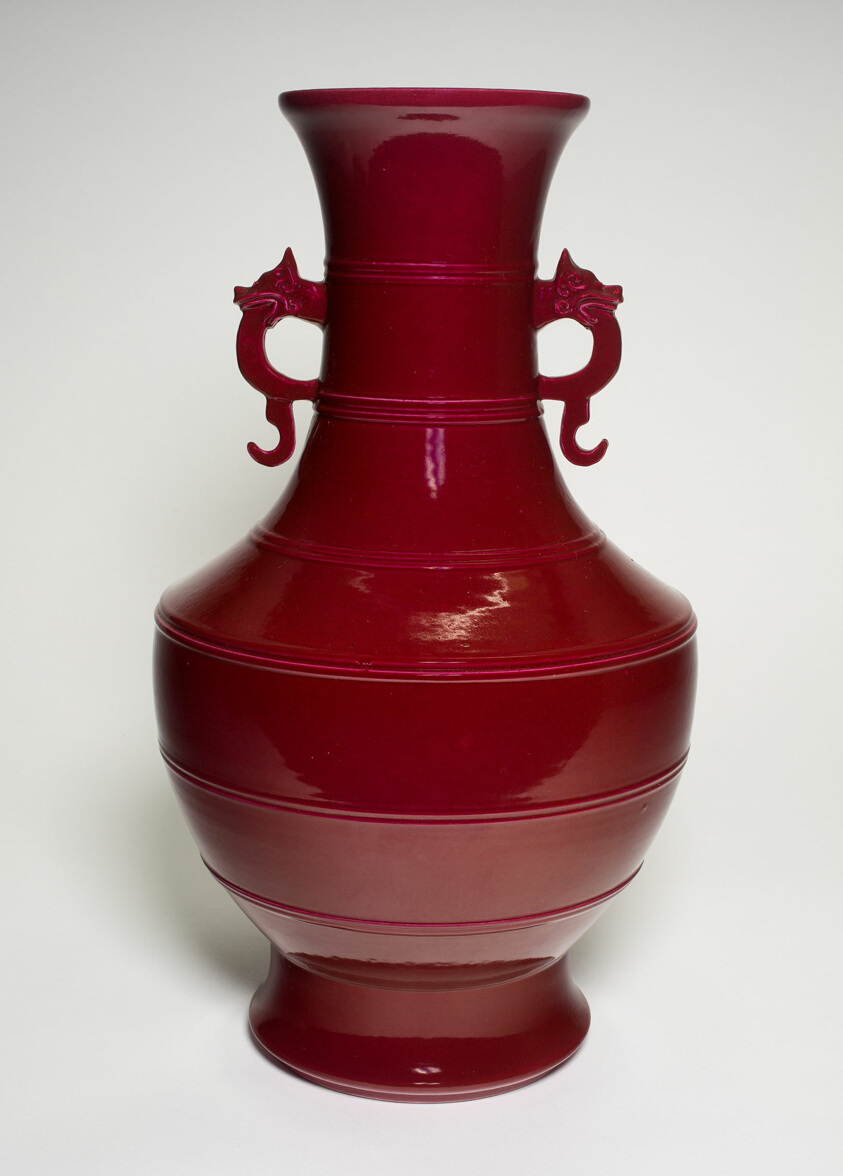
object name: Vessel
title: Vase in the Shape of an Ancient Ritual Bronze Hu Vessel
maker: China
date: Qing dynasty (1644–1911), Qianlong reign mark (1736–1795)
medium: Porcelain with crimson pink glaze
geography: China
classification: porcelain; ceramics; asian art; vessel